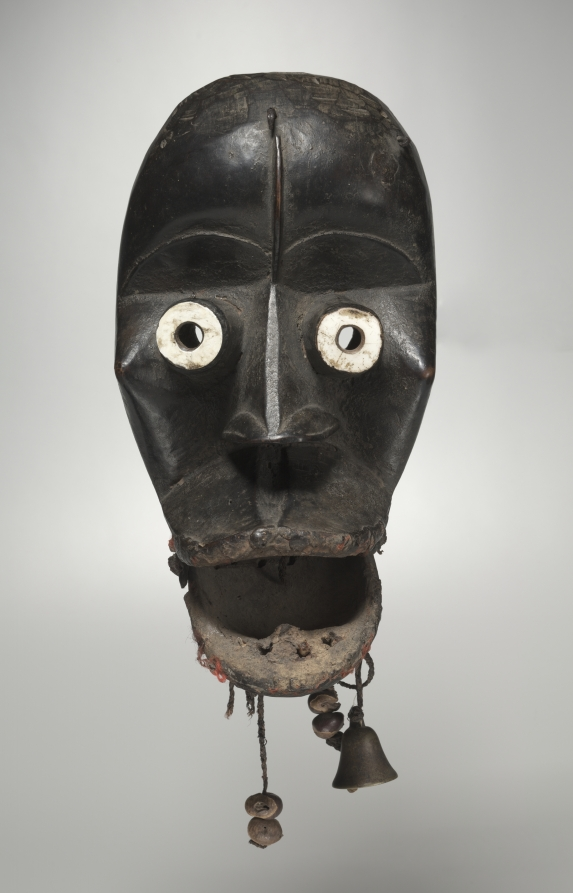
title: Mask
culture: Africa, West Africa, Liberia, Mano-style carver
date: early 1900s, before 1933–37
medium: Wood, copper alloy, plant fiber, cloth, rawhide or leather, teeth, seeds, resin, synthetic material, iron, and glass beads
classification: Mask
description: Generally, Mano masks are considered to be manifestations of forest spirits and can be grouped into 11 major types relating to aspects of social control, political and judicial matters, peacemaking, education, competition, and entertainment. This mask was acquired in Liberia by the medical missionary George Harley between 1933 and 1937.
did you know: The jaw of this mask is hinged, allowing it to open and close.